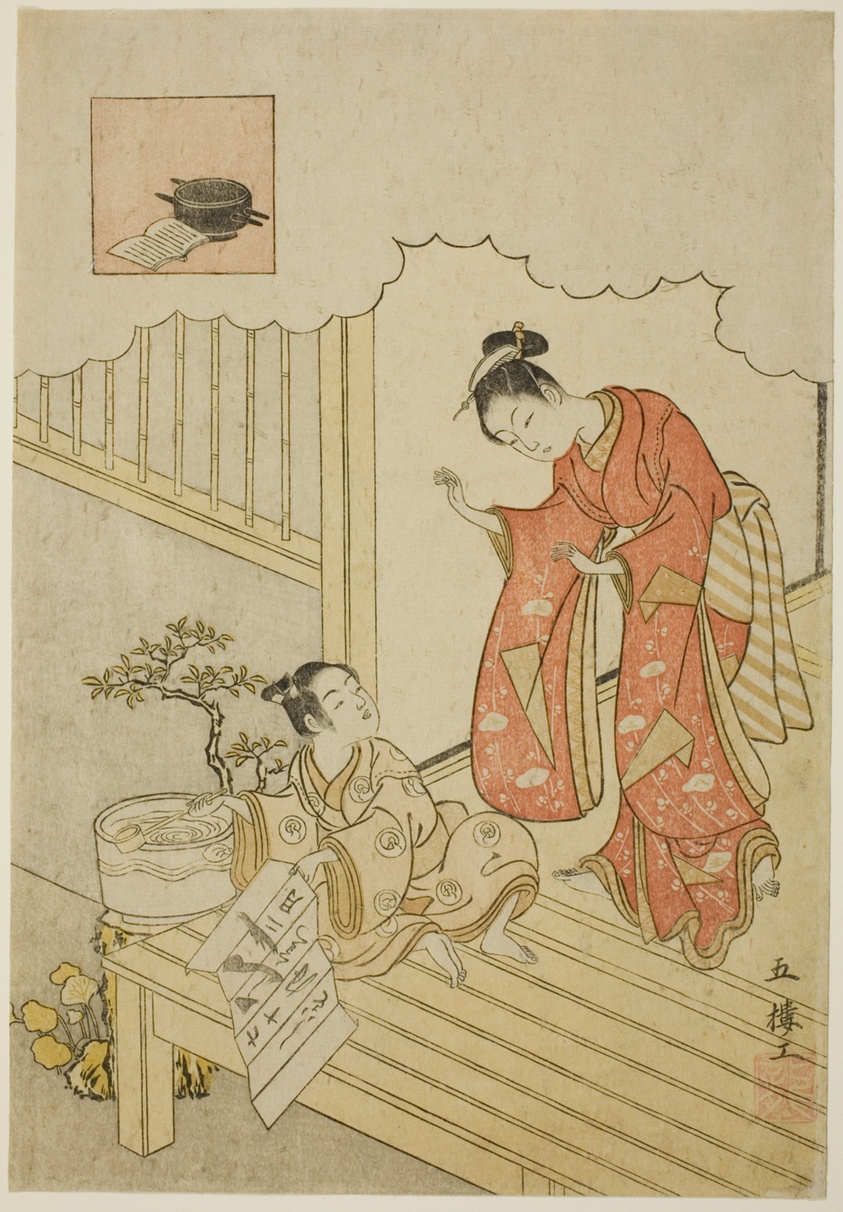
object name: Print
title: Ono no Komachi Washing the Book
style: Japanese (culture or style)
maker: Suzuki Harunobu 鈴木 春信; Japanese, 1725 (?)-1770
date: Edo period (1615–1868), 1765/66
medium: Color woodblock print; chuban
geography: Japan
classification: woodblock print; print; asian art